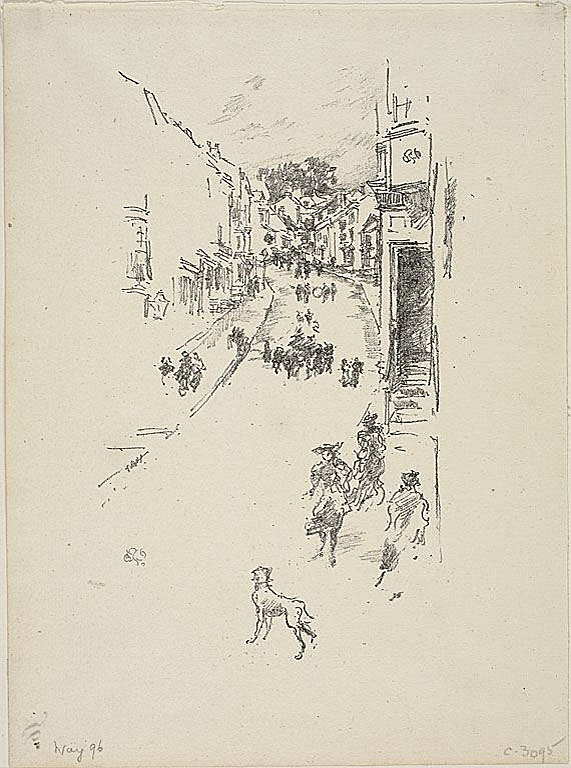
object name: Print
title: Sunday, Lyme Regis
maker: James McNeill Whistler (American, 1834-1903)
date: 1895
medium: Transfer lithograph in black on cream laid paper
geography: United States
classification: transfer lithograph; lithograph; print; prints and drawing; paper